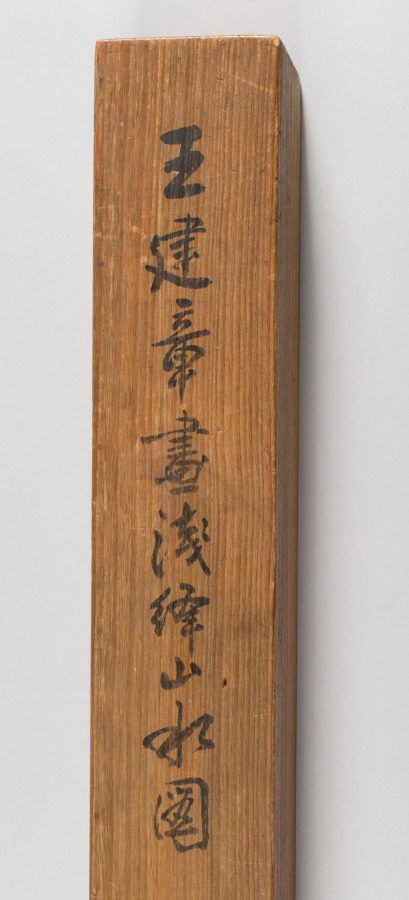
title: Solitary Colors of the Autumn Woods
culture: China, Ming dynasty (1368–1644)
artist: Wang Jianzhang (Chinese, active 1621–1662)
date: first half 1600s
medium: hanging scroll; ink and color on satin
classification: Painting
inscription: Artist's inscription, signature, and 2 seals: Cold frost falls on the fences,/ Solitary colors scatter the maples./ Reciting the chapter of "The Autumn Water,"/ I cannot still the emotion in my old heart. After the style of Fan Hua-yüan [Fan Kuan], Wang Chien-chang . [seals] Wang shih chih yin; Chien-chang. trans. LYSL/HK/WKH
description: Two gentlemen stand outside a thatched hut in a dense forest; some trees have bare branches indicating that the season is early autumn. Wang Jianzhang’s inscribed poem refers to a chapter called “Autumn Water” from Zhuangzi, a famous Daoist text written in the 3rd century BC: "Cold frost falls on the fences, / Solitary colors scatter the maples. / Reciting the chapter of “The Autumn Water,” / I cannot still the emotion in my old heart." Wang Jianzhang lived through the collapse of the Ming dynasty (1368–1644) and the rise of the Qing dynasty (1644–1911), when China was governed by the Manchus, an ethnic people from Manchuria who were traditionally viewed as “barbarians” by the Chinese. The poetic reference to Zhuangzi’s “Autumn Water” seems to discreetly convey Wang’s feelings about his country being taken over. “Autumn Water” was about learning to take steps in the foreign way, but not acquiring a foreign tongue. Perhaps Wang was lamenting his conflicted situation. For survival he had to adapt to the new political and social climate, while still trying to maintain his own identity and Chinese traditions.